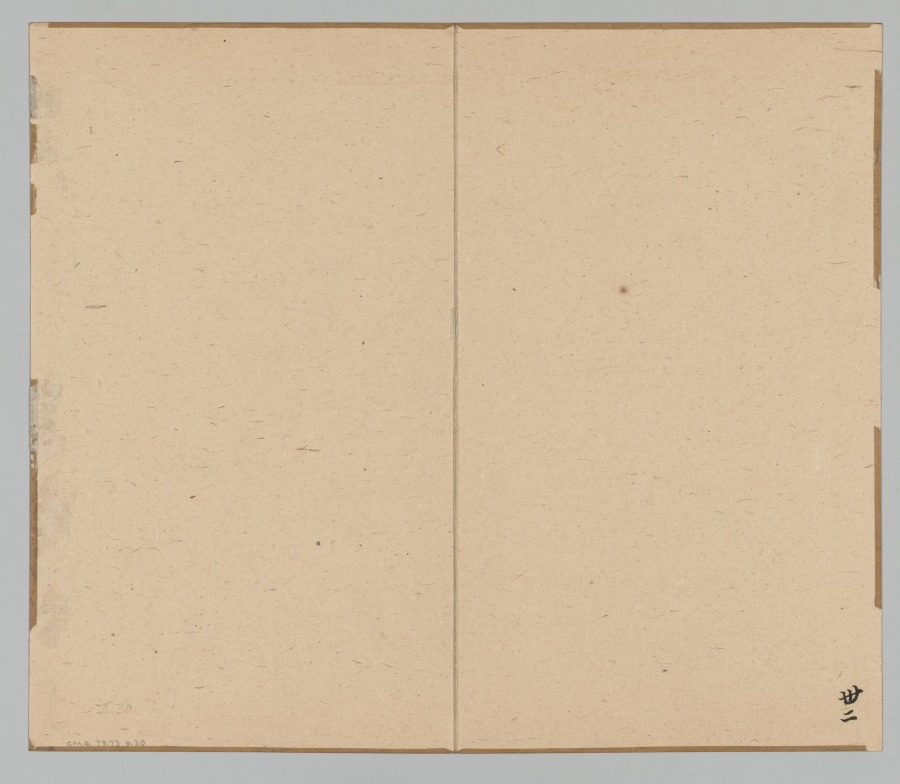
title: Reverberations of Taiga, Volume 2 (leaf 30)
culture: Japan, Edo period (1615–1868)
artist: Aoki Shukuya (Japanese, d. 1802)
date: mid- to late 1700s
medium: double-leaf from a pair of albums; ink and light color on paper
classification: Portfolio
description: Traditionally, young painters in Japan began their studies with an established master-painter. The master's compositions invariably became models that the apprentice copied to learn various ink and brush techniques. Shukuya was a pupil of the famous Kyoto artist Ikeno Taiga, whose style is reflected in these sketches of rocks, trees, and mountains.